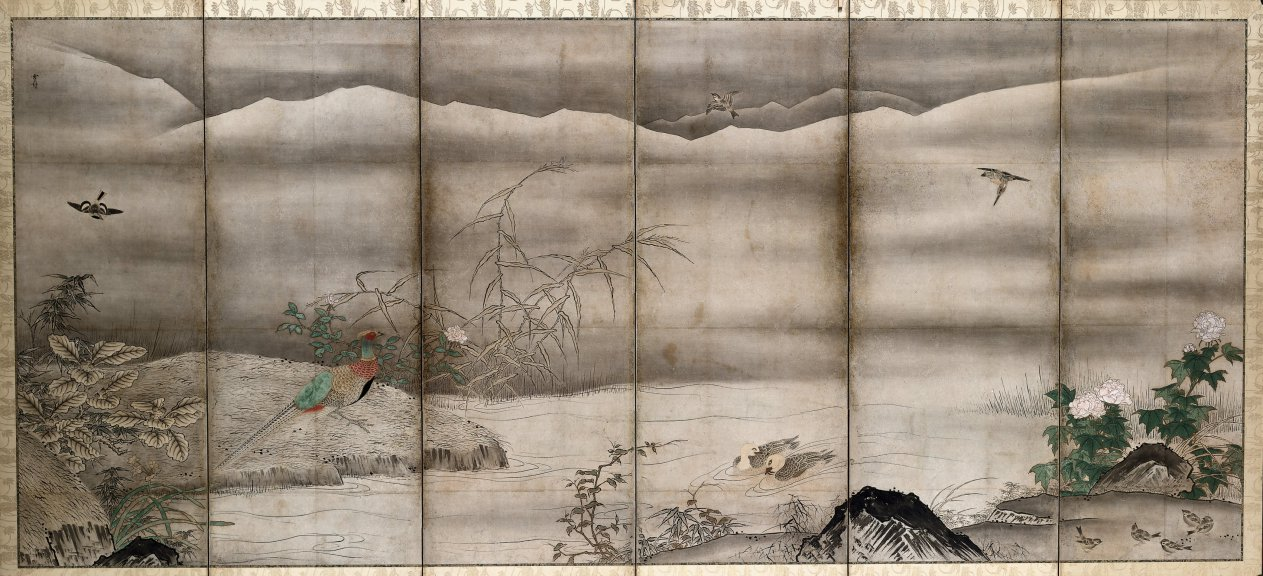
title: Birds and Flowers in a Landscape of the Four Seasons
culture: Japan, Muromachi period (1392–1573)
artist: follower of Sesshū Tōyō (Japanese, 1420–1506)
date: 1550–99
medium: Six-panel folding screen, ink and color on paper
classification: Painting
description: The monk-painter Sesshū is revered today, as he was in his own time. While he left Kyoto's sophisticated intellectual and cultural environment to live in a provincial village in a far western province, he seems never to have severed contacts with the monastic communities of his young adulthood. His residence in Yamaguchi proved fortuitous because his patron, the region's military lord, enjoyed considerable freedom in conducting trade missions overseas with Korea and China. Sesshū went to China in 1467 and traveled about the country, visiting well-known historical sites and Chan (Zen) temples before returning two years later. Thus he became familiar with contemporary painting practices, materials, formats, and subject matter. His assimilation and then transmission of these elements had a profound impact on the following generations of ink painters, patrons, and Zen communities throughout Japan. Despite the presence on these byōbu of the name "Sesshū," they are from the hand of another accomplished but as yet anonymous follower active in the middle of the sixteenth century. Sesshū's name here, as on a handful of similar bird-and-flower byōbu, attests to the master's identification at that time with the colorful mural paintings on the same theme emanating from Ming dynasty China. This genre had heretofore been relegated to hanging scroll compositions, so the intro-duction into temple and daimyo residences of such an attractive theme surely caused considerable excitement in the later fifteenth century, when in all likelihood Sesshū introduced it into the Japanese painting repertoire. Subsequently, artists of varying backgrounds and training tried their hands at these large, dramatic scenes. From right to left the composition portrays an array of flowering plants in the near distance that indicate the passage of the seasons. Birds, usually paired, occupy this setting, engaged in various activities that lend naturalism and an air of peacefulness. The world they inhabit may be characterized pictorially by expansive middle-ground waterscapes that end where the far distant mountains rise as backdrops. These features appear consistently in other bird-and-flower byōbu attributed to Sesshū. Also noteworthy is the absence of any birds of prey such as the samurai's beloved hawks, emblems of fierceness and graceful strength that appear often in the byōbu of sixteenth-century Kano and Soga school painters.